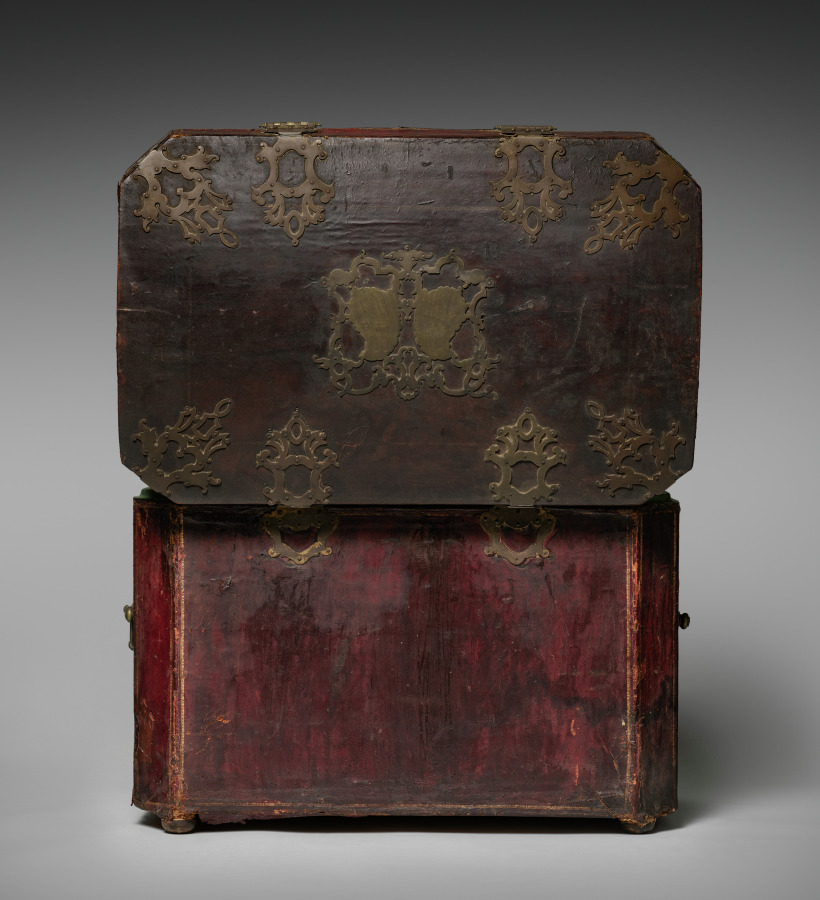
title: Chest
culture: Italy, Venice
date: 1700s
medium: leather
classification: Miscellaneous